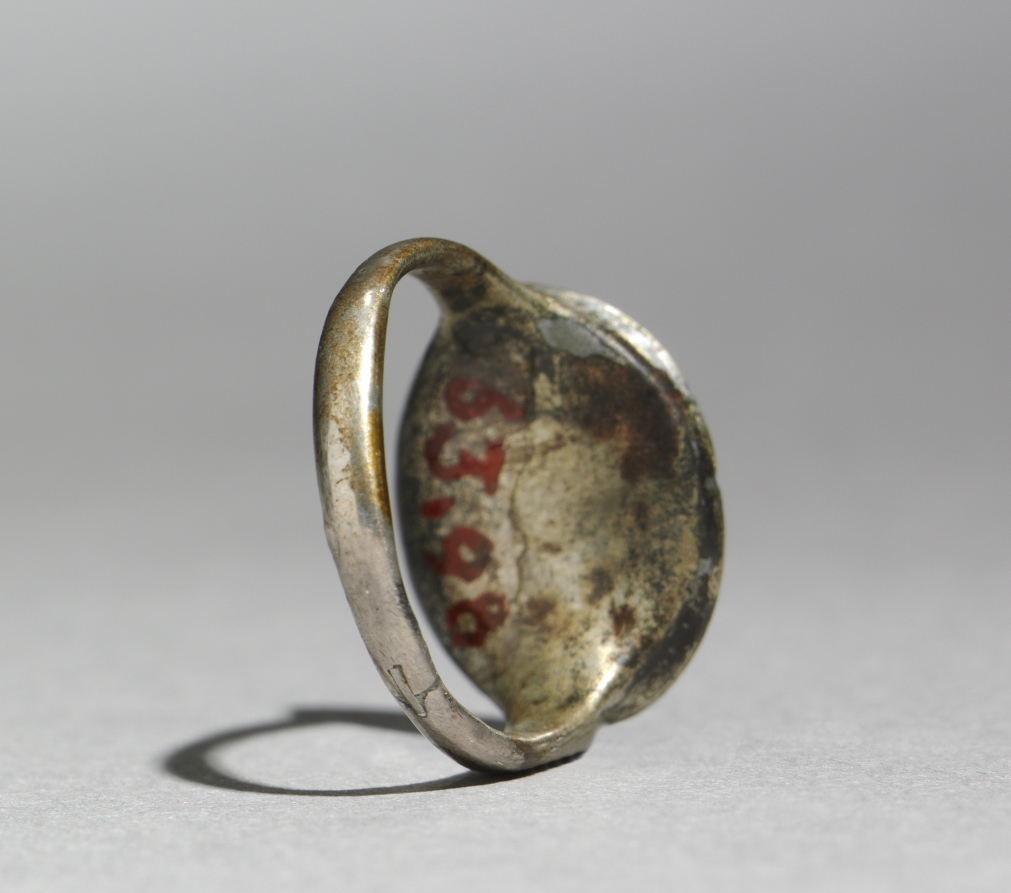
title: Finger Ring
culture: Greece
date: 300s BCE or later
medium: silver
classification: Jewelry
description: This silver signet ring depicts a kneeling figure facing left in a heavy robe, with hands outstretched and wearing a headdress. The figure is probably a priest or priestess making an offering at an unseen altar. Less skilled carving and the worn surface make the image difficult to interpret, especially the object in the figure’s right hand.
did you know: When signet rings were stamped, the image would be reversed on the stamped surface.